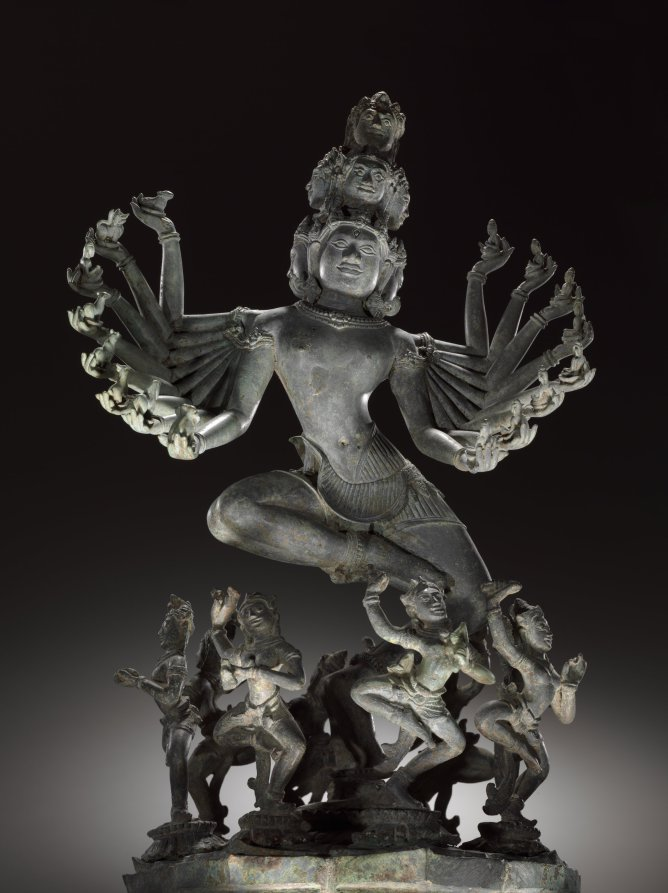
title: Hevajra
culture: Northeastern Thailand, former kingdom of Angkor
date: c. 1200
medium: Bronze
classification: Sculpture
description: Hevajra was an important figure signaling the practice of Buddhist rituals. King Jayavarman VII placed particular emphasis on Hevajra during consecration rituals and set up a colossal stone sculpture of dancing Hevajra at the east gate of his fortified city in the Khmer capital at Angkor. In the Cambodia of Jayavarman VII, tantric Buddhism became public and widespread, practiced together with other more mainstream forms of Buddhism, Hinduism, and ancestor worship. The iconography of Hevajra is described in detail in a text that bears his name, the Hevajra-tantra, first composed in India probably in the 800s. Hevajra has eight heads, sixteen arms, and four legs. His left hands hold images of Indic gods; wealth, death, sun, moon, fire, wind, water, and earth. In his right hands are animals: bull, lion, human, cat, camel, sheep, horse, and elephant. They all sit in skull cups, objects also used in tantric rituals. He dances on a corpse that embodies ignorance and is surrounded by eight yoginis who dance triumphantly in a ring around him. Yoginis functioned as intercessors between human practitioners and enlightened beings. Many bronze images of Hevajra were made during the reign of Jayavarman VII, but few survive in as pristine condition as this example. According to scientific analysis and curatorial reports, this sculpture survived in a clay vessel submerged in water, which accounts for its high tin content and unusual gray patina. Samples from the clay core reveal the presence of the mineral feldspar, a characteristic of clay from the Isaan plateau, on the other side of the mountain range not far from Banteay Chhmar, in present-day Thailand.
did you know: Hevajra, the Tantric Buddhist deity who personifies Enlightenment, dances vigorously to symbolize the human soul's liberation from the snare of existence.